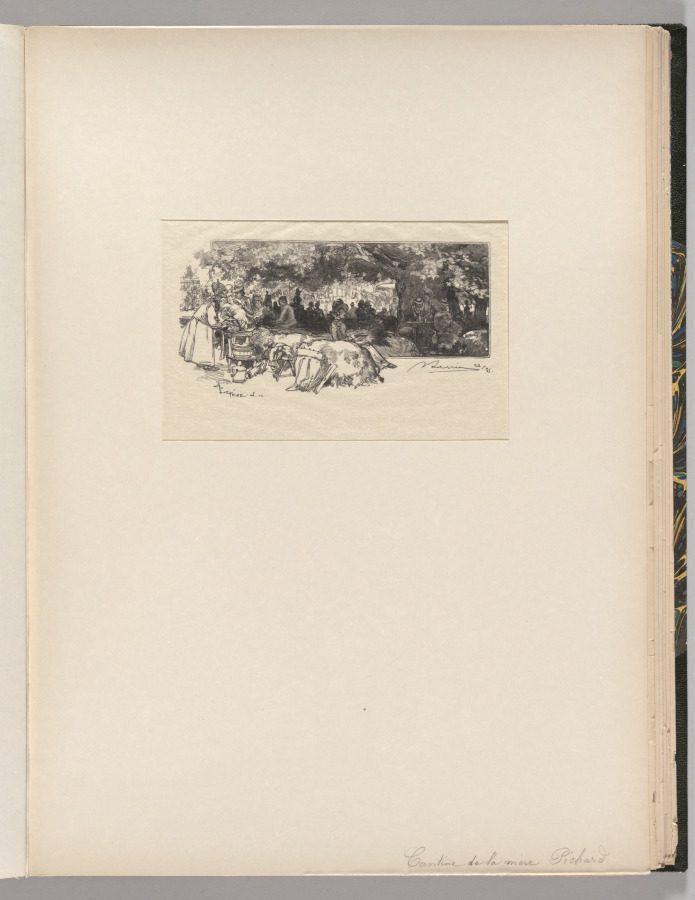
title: Fontainebleau Forest: Mother Pichard's Canteen (La Forêt de Fontainebleau: Cantine de la mère Pichard)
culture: France, 19th century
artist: Auguste Louis Lepère (French, 1849–1918)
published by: A. Desmoulins, Published in Revue Illustrée, 1887–90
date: 1890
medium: wood engraving from bound volume of 34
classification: Bound Volume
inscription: In block, lower left: A. LEPÈRE. Del. sc; below image, lower right, in black ink: ALepère 22/35; on window mat, lower right, in graphite: Cantine de la mère Pichard